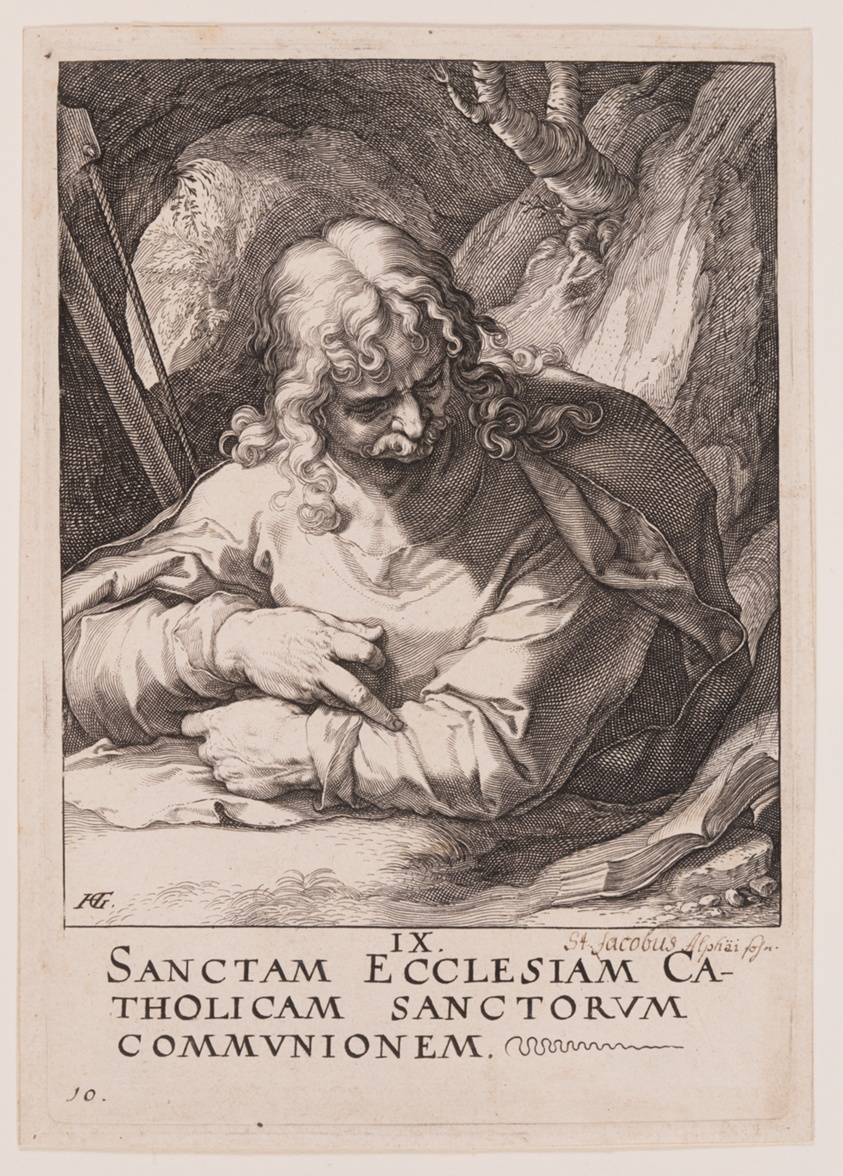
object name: Print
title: St James the Less, from Christ, the Apostles and St Paul with the Creed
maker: Hendrick Goltzius (Dutch, 1558–1617)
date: 1589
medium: Engraving on ivory laid paper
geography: Netherlands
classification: engraving; paper; print; prints and drawing